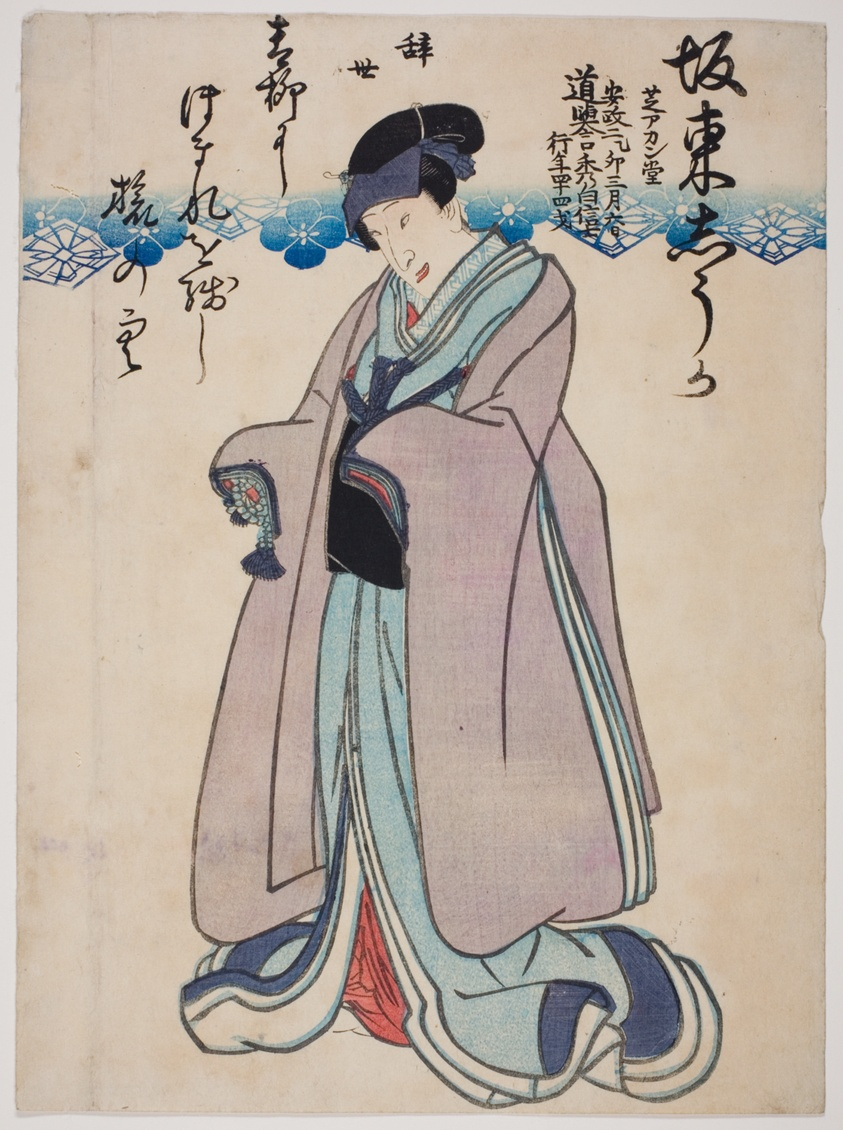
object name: Print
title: Memorial Portrait of the Actor Bando Shuka I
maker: Utagawa School (Japanese, 19th century)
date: 1855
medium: Color woodblock print; oban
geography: Japan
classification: print; asian art